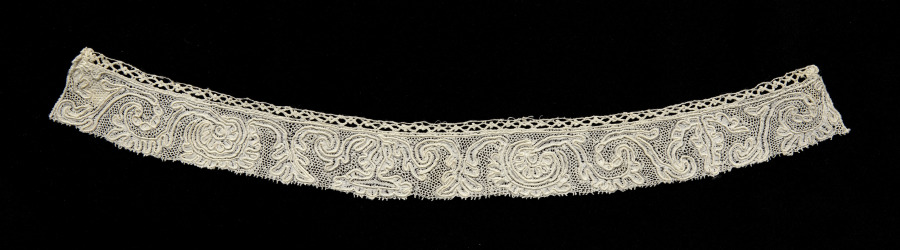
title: Lace Collar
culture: Italy, Milan(?)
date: 1700s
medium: Bobbin lace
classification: Lace